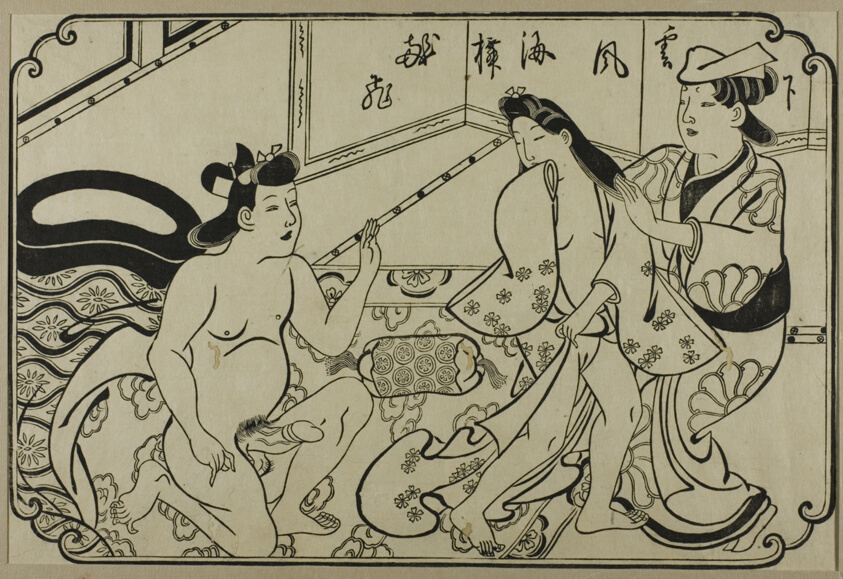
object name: Print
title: A sheet from a shunga album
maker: Hishikawa Moronobu (Japanese, d.1694)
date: 1680s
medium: Woodblock print; sumizuri-e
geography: Japan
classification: woodblock print; print; asian art